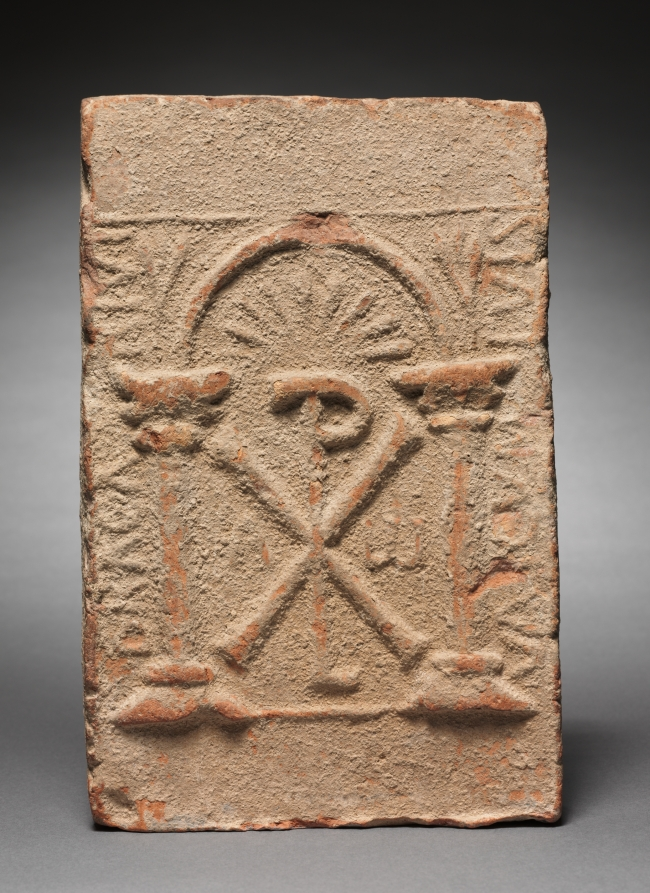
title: Columbarium Tomb Plaque with the Monogram of Christ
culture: Spain (Visigothic or Byzantine)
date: 400–800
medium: terracotta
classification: Sculpture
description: This thick clay plaque covered a burial niche that contained the remains of the deceased in a simple communal tomb complex called a columbarium. The chi-rho monogram of Christ identifies the deceased as a Christian. The monogram was seen as representing Christ’s victory over death, while the letters that flank it, alpha and omega, the first and last letters of the Greek alphabet, symbolize Christ as the beginning and end of all things.